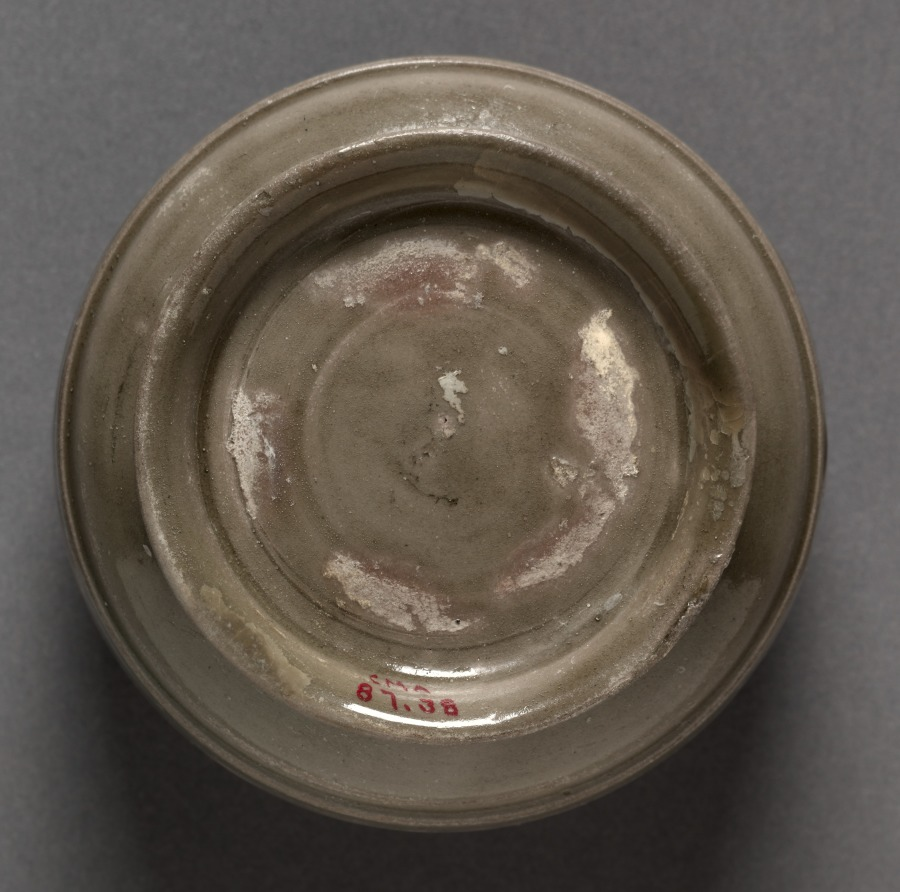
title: Covered Box with Double-Parakeet Design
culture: China, Zhejiang province, Five dynasties (907-60) or later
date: 900s-1100s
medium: Glazed stoneware with incised decoration, Yue ware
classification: Ceramic